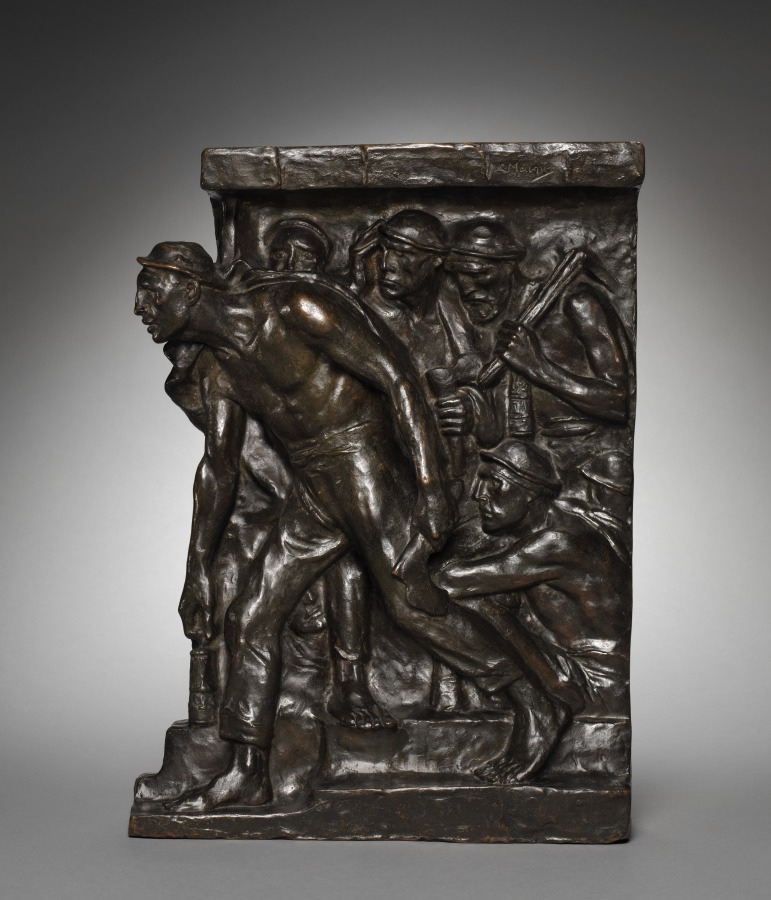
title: The Furnace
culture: Belgium, 19th century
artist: Constantin Meunier (Belgian, 1831–1905)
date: c. 1890 – 1900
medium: bronze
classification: Sculpture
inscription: Signed lower right side: "C. Meunier"; inscribed lower right: "B. Verbeyot, Fondeur, Bruxelles."